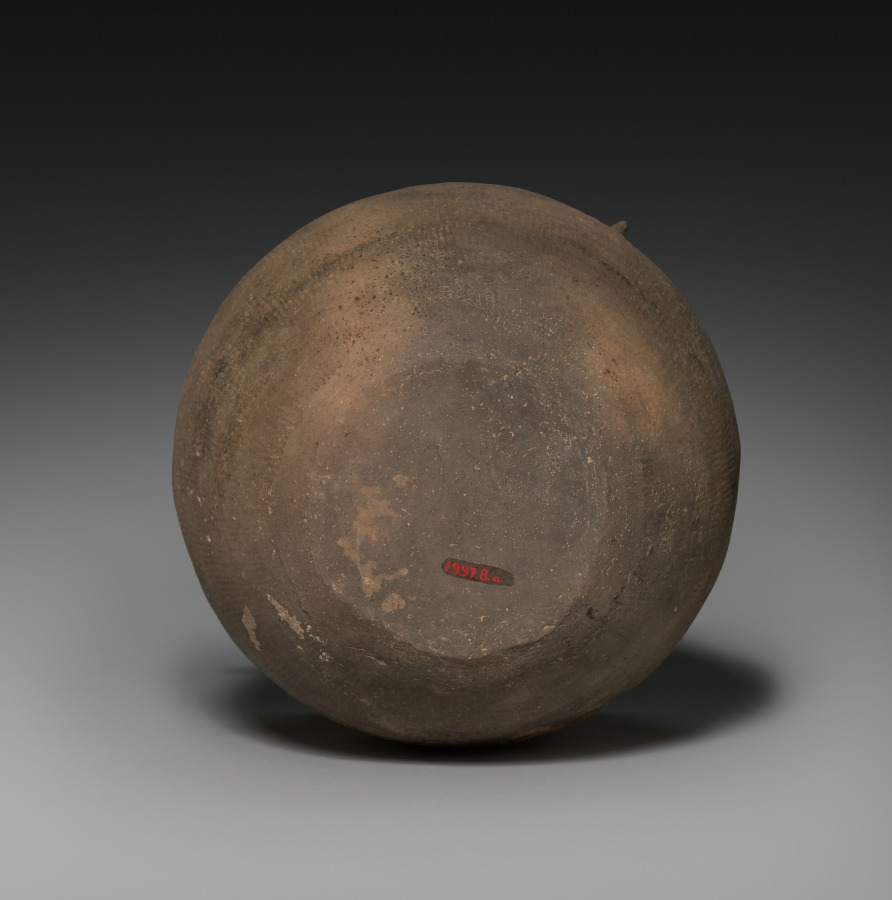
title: Lidded Jar with Four Horn Lugs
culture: Korea, Gaya period (42–562 CE)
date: 200s–400s CE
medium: earthenware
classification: Ceramic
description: Closed kilns built on hillsides became widely used for producing this type of pottery vessel in Korea during the Three Kingdoms period. Both its gray color and shimmering glaze are the result of the reduction of oxygen in the closed kiln chamber built on hillsides.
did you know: This pottery vessel served to contain cremated remains, indicating the popularity of Buddhist mortuary practice in Korea during the Three Kingdoms period.